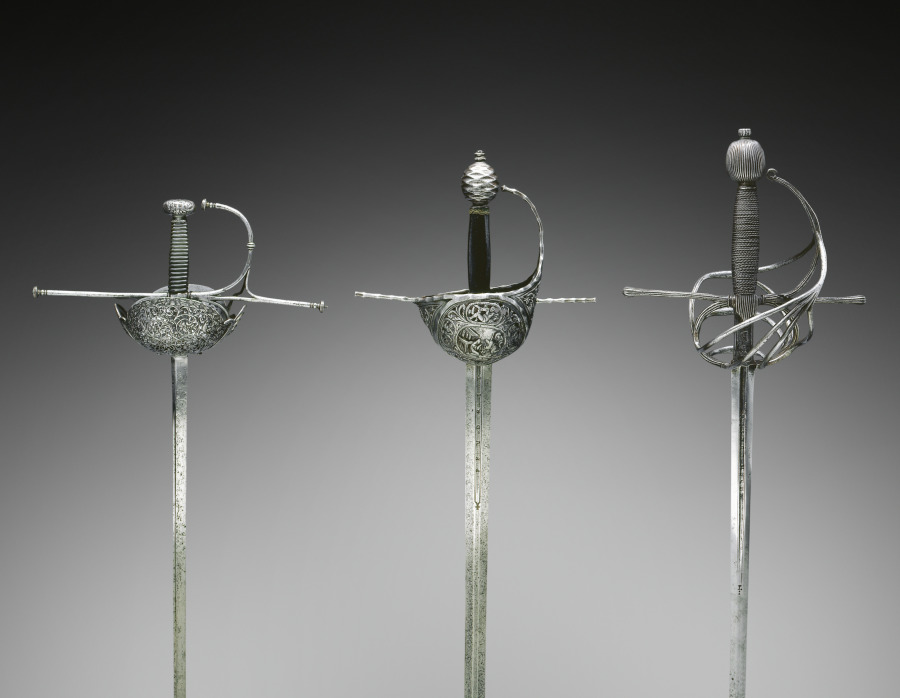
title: Rapier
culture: Spain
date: c. 1650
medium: steel, pierced and chiseled, leather and wood grip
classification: Arms and Armor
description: The rapier was a sword worn with civilian dress and used in duels. The term rapier derives from a 16th-century French word rapière, which in turn derived from the Spanish espada ropera, or “dress sword.” The rapier was a light weapon with a straight double-edged and pointed blade that, with the development of the art of fencing in the 1500s and 1600s, gradually became narrower and lighter, and thus suitable for thrusts only. With the new technique of swordplay emphasizing the point of the blade, sword guards became more complex to protect the duelist’s unarmored hand. These elaborate guards were frequently decorated by various techniques—chiseling, bluing, russeting, and damascening.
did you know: Many civilians wore swords for self defense and for settling disputes by dueling; the swords often reflected contemporary taste and fashion.